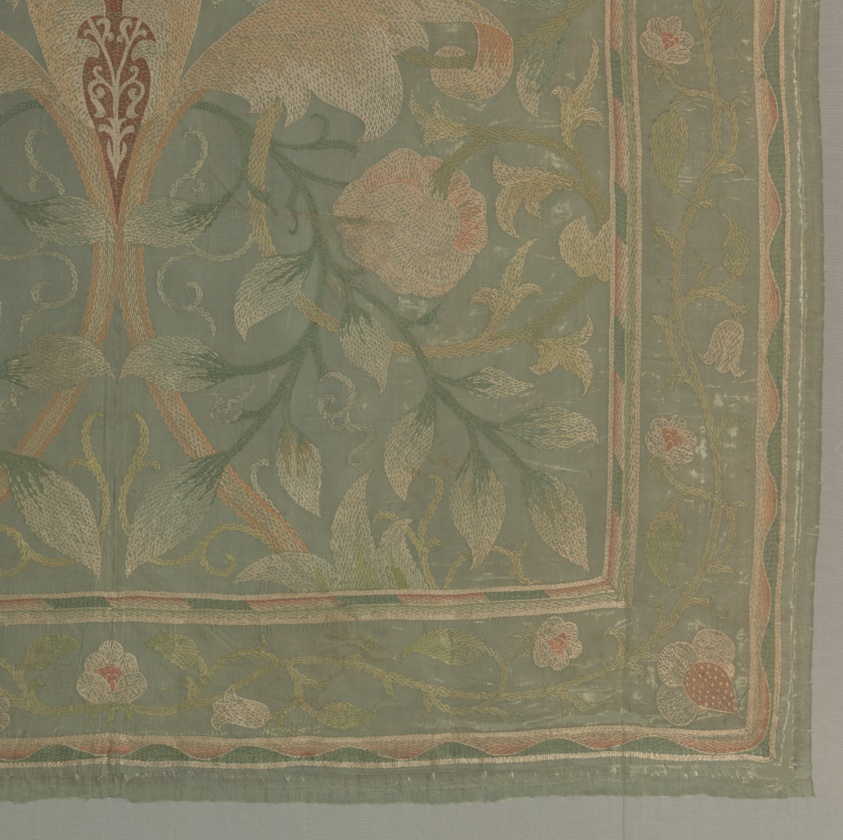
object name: Textile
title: Lotus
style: Arts and Crafts Movement, british, 19th century, British Arts and Crafts Movement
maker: Design attributed to May Morris (English, 1862–1938); Produced by Morris & Co., London (English, 1875–1940); Embroidered by the Decorative Arts Society, Chicago (American, founded 1877)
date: Design by 1888, made 1888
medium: Silk, warp-float faced twill weave; embroidered in satin and stem stitches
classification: textile; needlework (visual works)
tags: floral, lotus